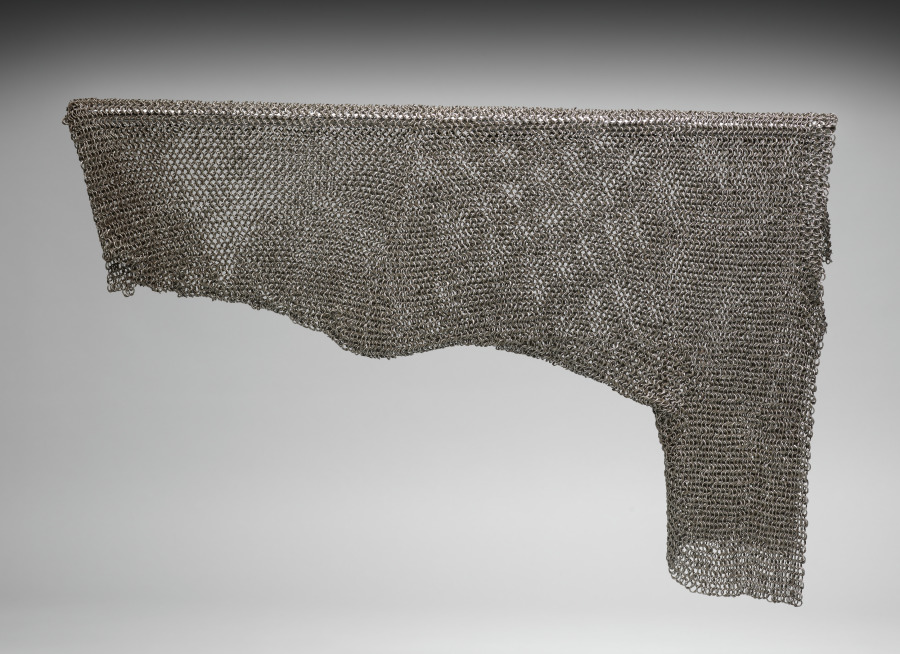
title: Sleeve of Chain Mail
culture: Germany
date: 1500s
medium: steel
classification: Arms and Armor